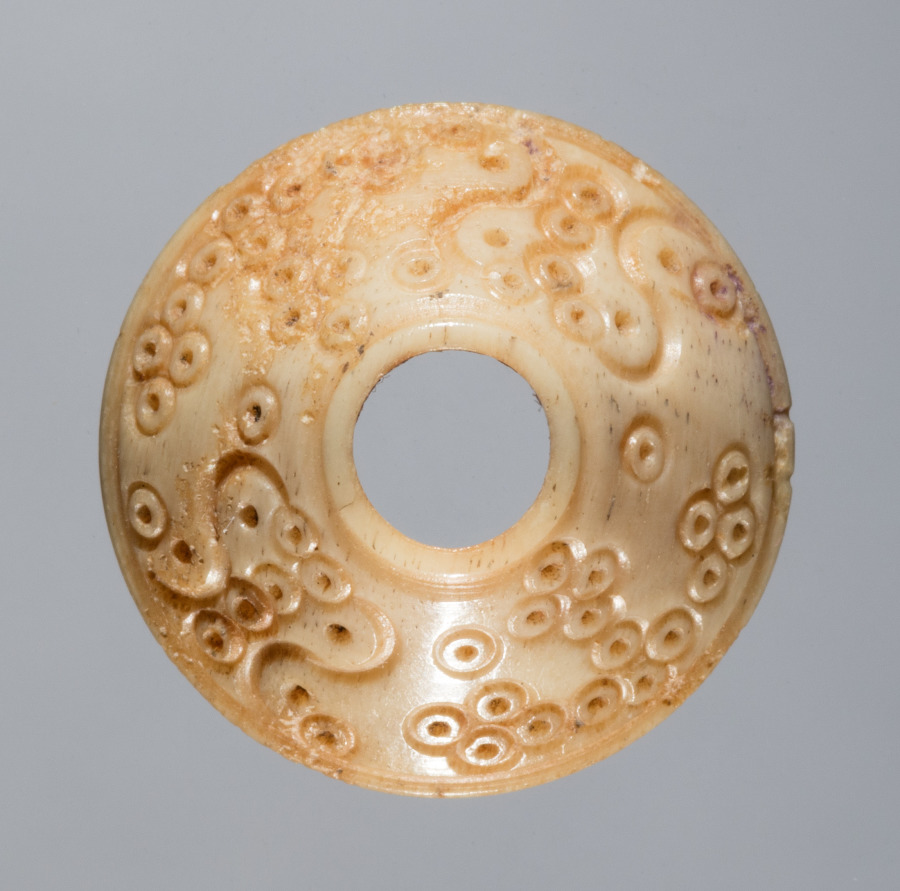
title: Spindle Whorl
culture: Iran, early Islamic period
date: 700s - 900s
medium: bone, incised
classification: Spindle Whorl